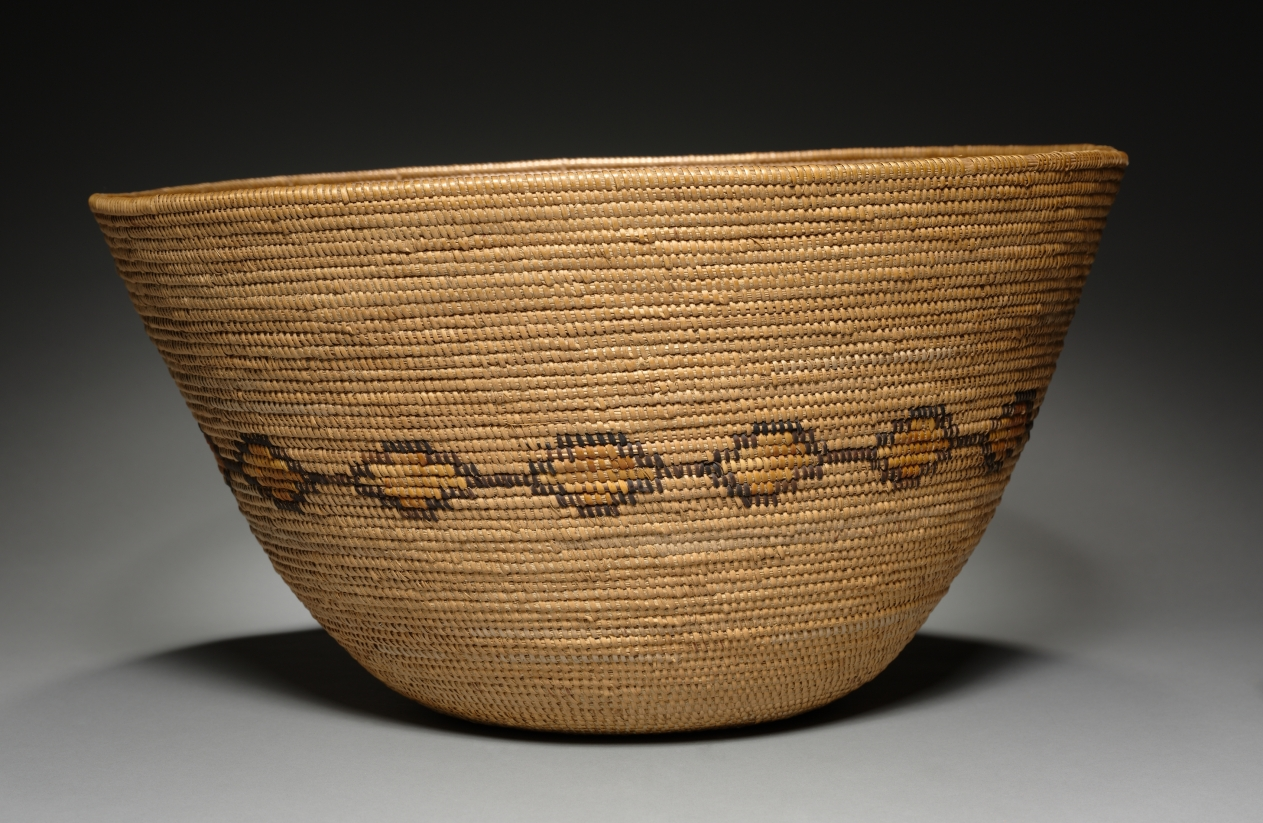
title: Food / Carrying Bowl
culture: California, Southern, Gabrielino (San Gabriel, Mission, or Tongva), 20th century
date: before 1929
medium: coiled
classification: Basketry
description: CMA Bulletin, December 1930